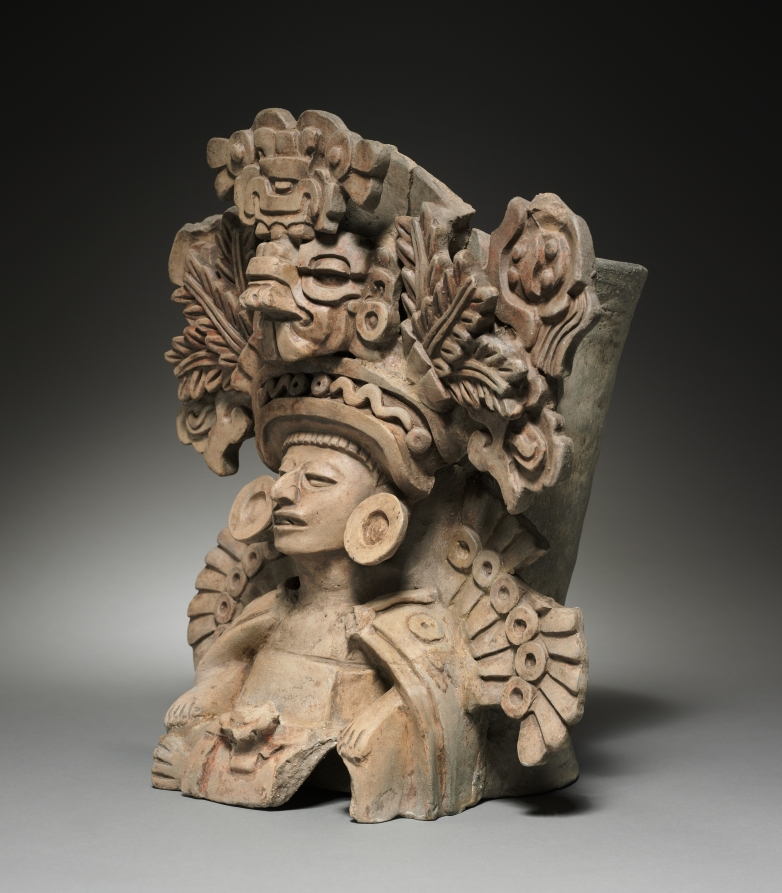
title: Funerary Urn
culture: Mexico, Oaxaca, Zapotec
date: 350–500 CE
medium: terracotta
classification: Sculpture